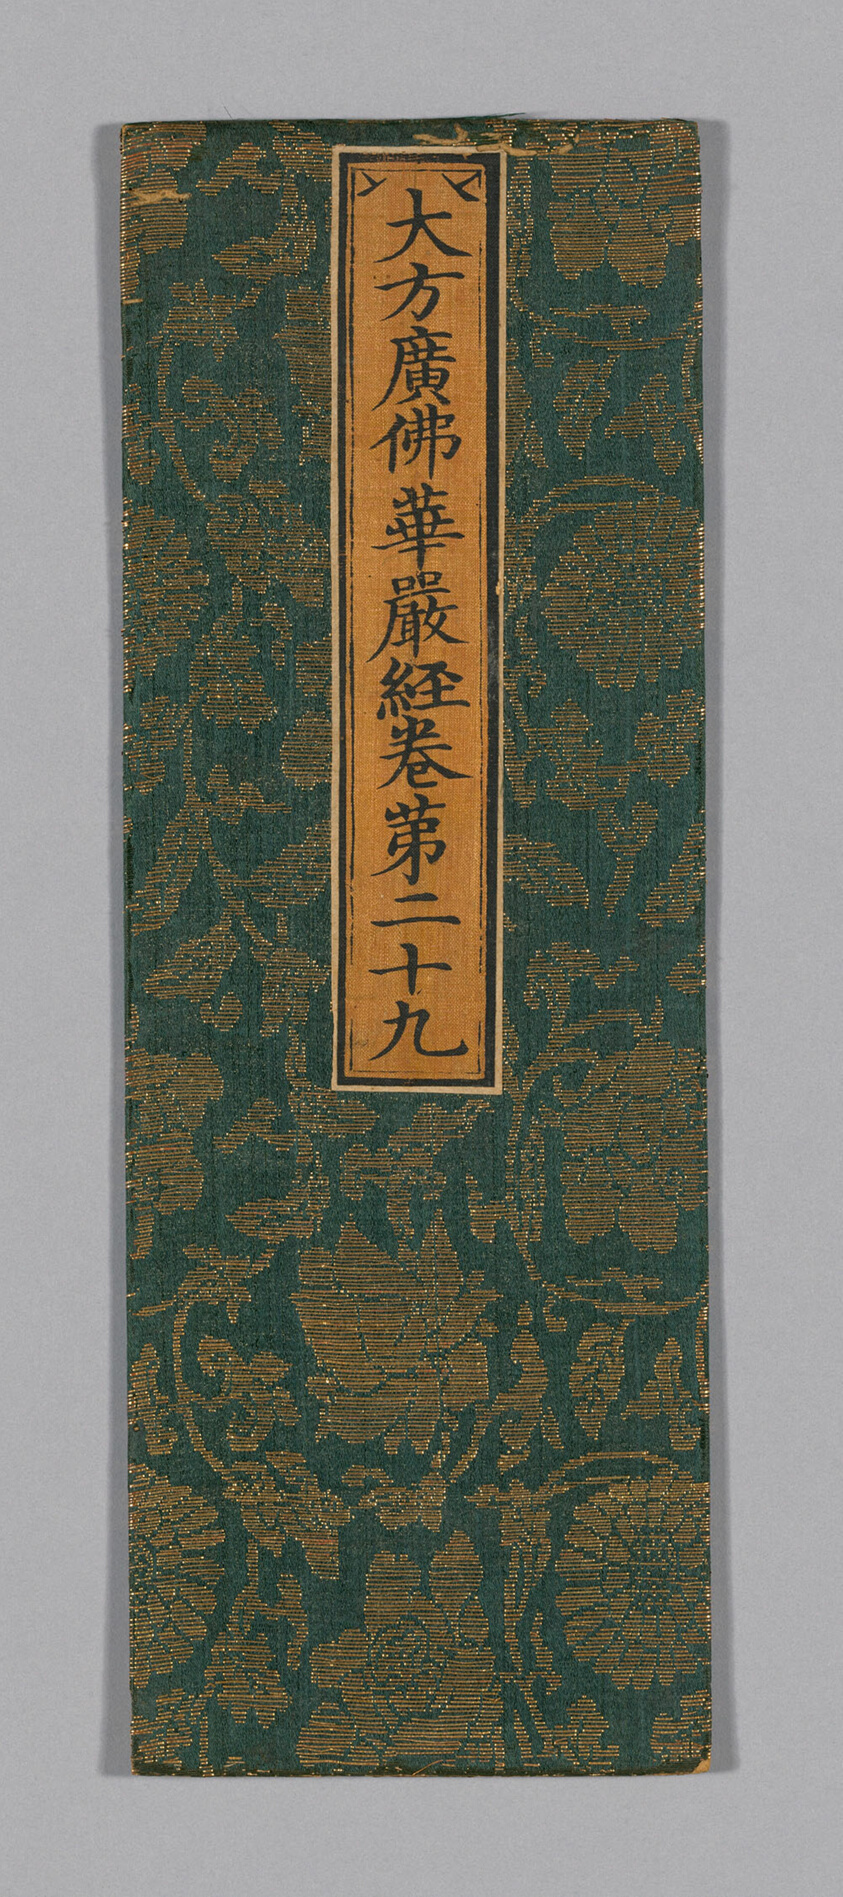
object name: Textile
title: Sutra Cover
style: ming, Chinese (culture or style), East Asian, asian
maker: China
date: Ming dynasty (1368–1644), c. 1590's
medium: Silk and gold-leaf-over-lacquered-paper strips, warp-float faced 4:1 satin weave with supplementary patterning wefts bound in weft-float faced 1:4 satin interlacings; label: silk, plain weave; painted with ink, glued over paper;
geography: China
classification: textile; weaving